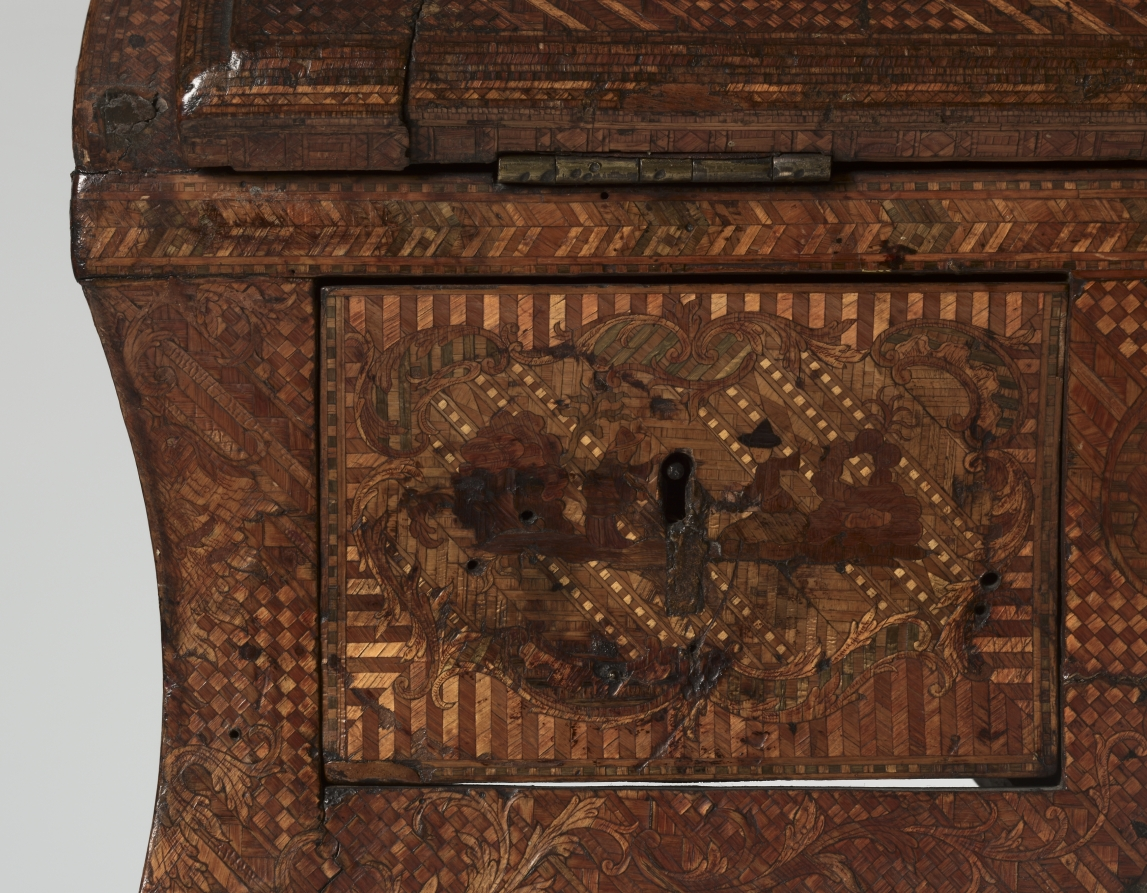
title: Ladies Writing Desk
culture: Possibly Northern Italy, near France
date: c. 1750–75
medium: Oak with straw marquetry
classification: Furniture and woodwork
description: As early as the beginning of the 17th century, straw marquetry was being produced throughout Europe. Along with cabinetmakers and specialized artisans, creators of straw marquetry included home artisans, nuns, monks, and noble dilettantes. Thus the quality and design of objects using straw marquetry is quite diverse. While some pieces appear nearly naive, others are made very masterfully, such as with this ladies writing desk. Some of these objects were even presented in royal cabinets of wonder. Because of its silky gloss and bright colors, straw marquetry was held in great esteem as unusual and remarkable decoration for furniture and other objects on par with gemstones, tortoiseshell, or ivory.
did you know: The surface of this ladies writing desk is completely covered with straw marquetry decoration both outside and in.